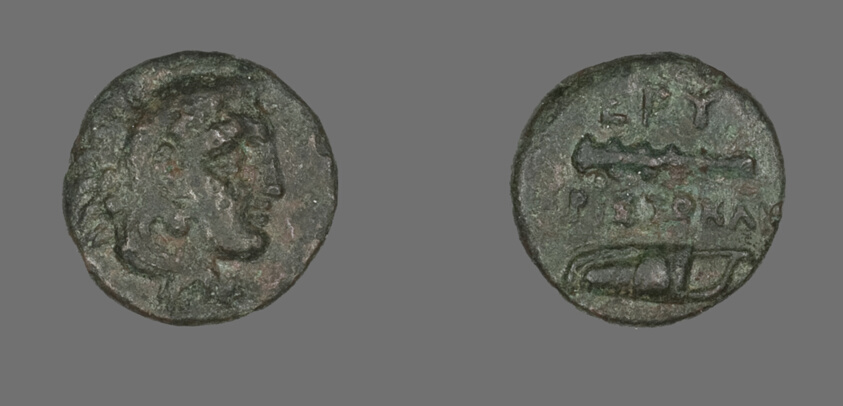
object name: Coin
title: Coin Depicting the Hero Herakles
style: greek, ancient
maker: Greek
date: 4th century BCE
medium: Bronze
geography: Ancient Greece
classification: coin; ancient art